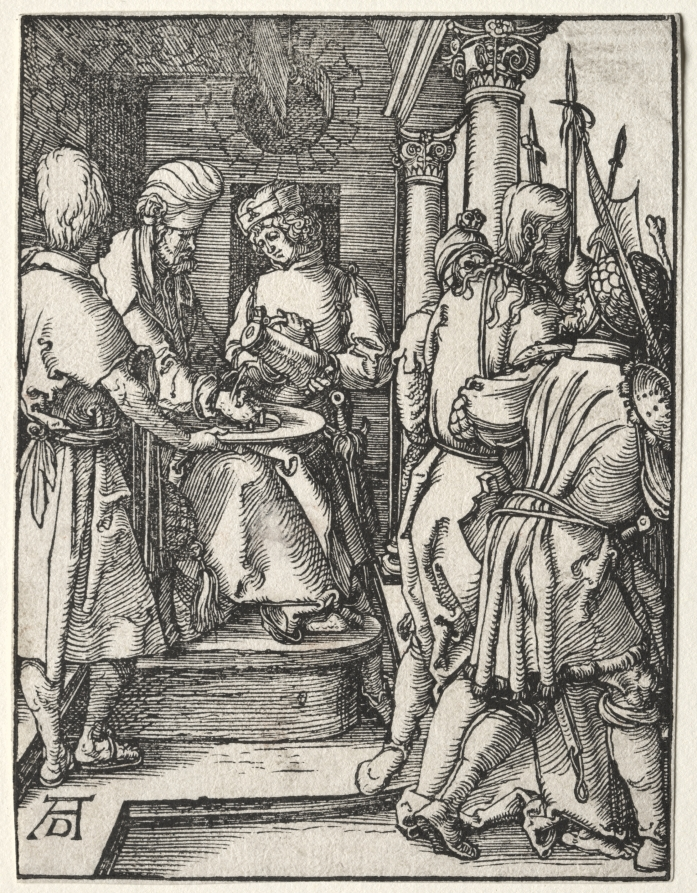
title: The Small Passion: Pilate Washing His Hands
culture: Germany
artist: Albrecht Dürer (German, 1471–1528)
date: 1509–1511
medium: woodcut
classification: Print